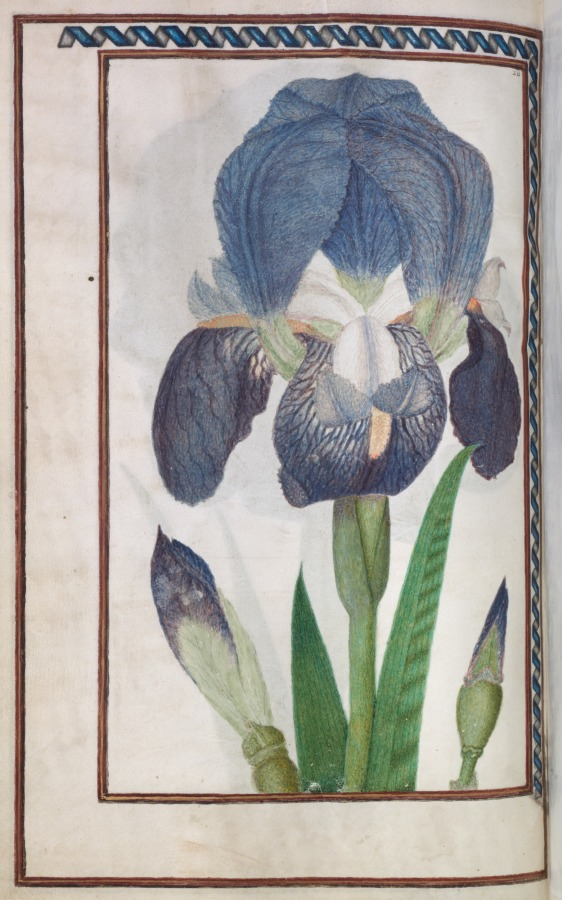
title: Blue and White Iris, folio 15 (verso), from Florilegium (A Book of Flower Studies)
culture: France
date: 1608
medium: watercolor, ink, silver, and gold over occasional traces of pencil, on vellum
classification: Bound Volume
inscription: Dated: Poitiers 1608 (on frontispiece) Signed: On frontispiece in black ink, lower right: Van Kuyk Notation on drawing: Frontispiece: in pencil, lower margin: * élève de Van Kessel, peintre flammand (* in pencil also appears in front of Van Kuyk's name).